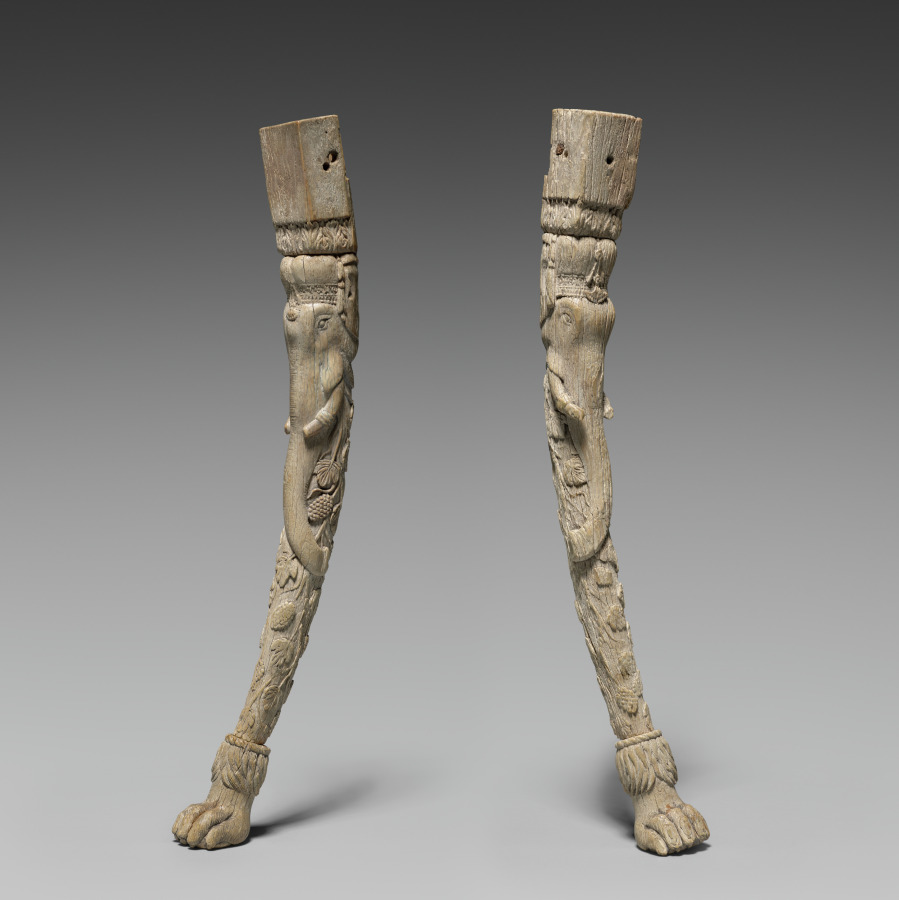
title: Chair Legs and Panel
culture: Afghanistan, Begram (chair legs); India (panel), Kushan period (chair legs); Mughal dynasty (1526-1756) (panel)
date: 300s CE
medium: ivory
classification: Ivory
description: This ivory carving was made to sheath wooden furniture made in India for trade along the Silk Road, which stretched from Rome to China. Indian ivory-faced furnishings--along with lacquer boxes from China and painted glass from Rome--were found in an extraordinary deposit of luxury goods at a site called Begram. The wood on which the ivory and lacquer were affixed has long disintegrated, and only the small pieces remain.